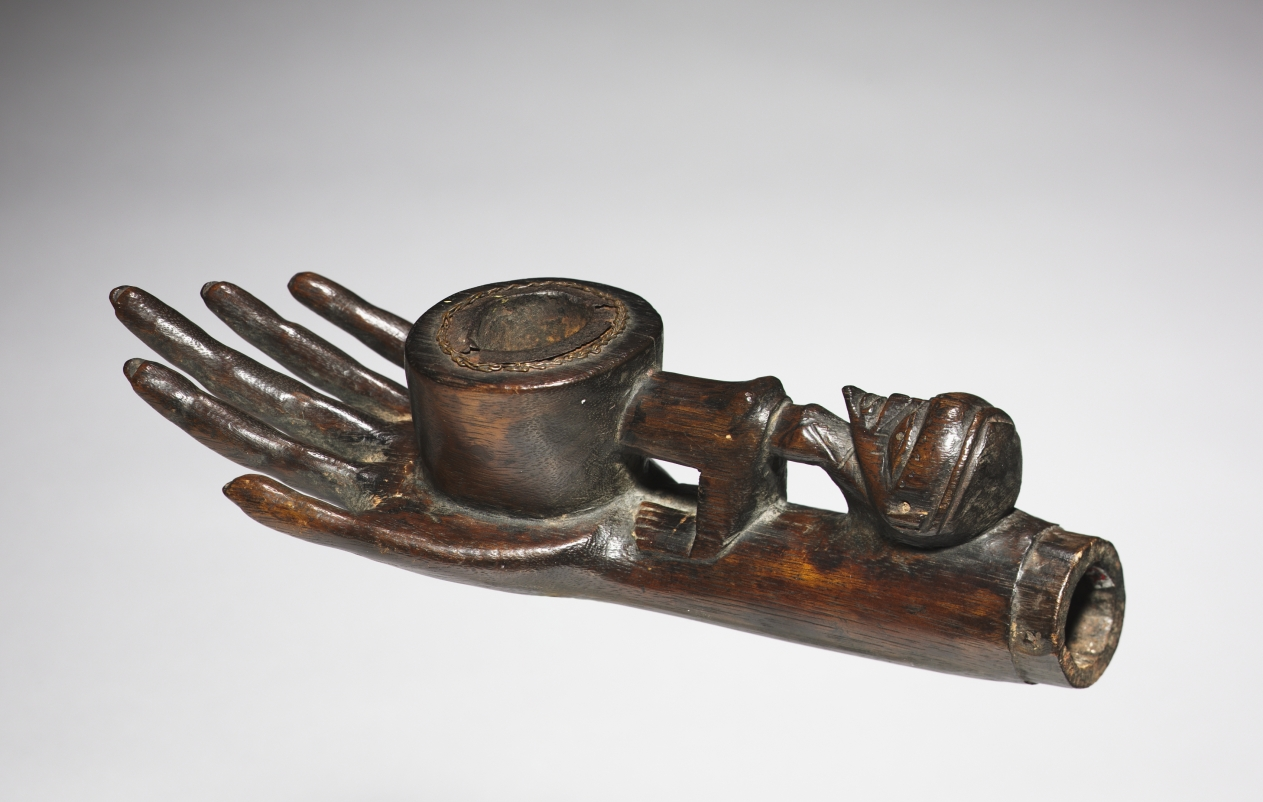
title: Pipe bowl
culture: Africa, Central Africa, Democratic Republic of Congo, Luluwa or Luntu maker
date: early to mid-1900s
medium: Wood, iron, and copper alloy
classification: Implements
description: Tobacco smoking had important social connotations in Central Africa, denoting age, status, and gender. Perhaps the enlarged hand expressed physical and spiritual powers and indicates that this work belonged to a chief. Figuratively carved pipes and snuff mortars constitute important genres of Luluwa decorative arts. As personal objects reflecting the prominence and success of their male and sometimes female owners, they are usually the creative work of virtuoso artists and take a variety of often imaginative shapes.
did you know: The cavity for the tobacco is positioned in the belly of a figure who holds himself up with bent arms on the pipe.